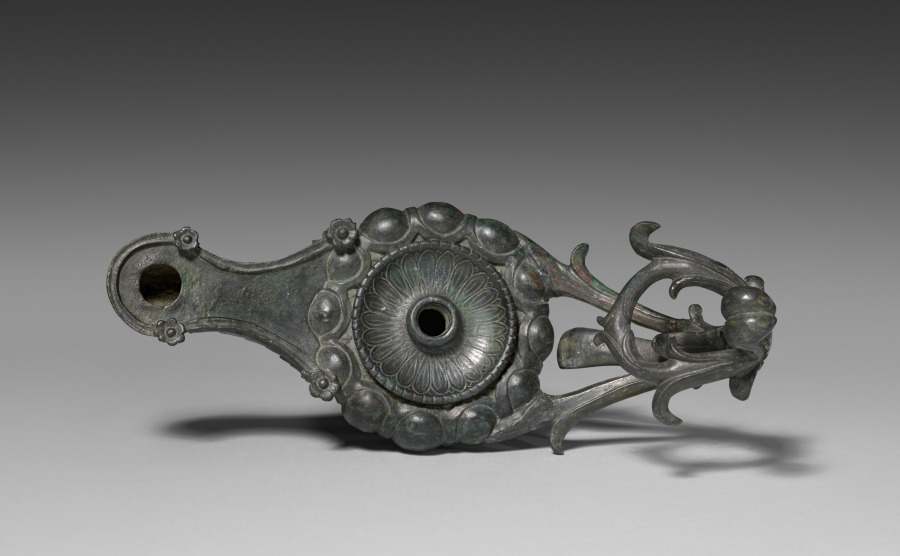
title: Oil Lamp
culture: Roman, late Republican-early Imperial (c. 50 BCE – 50 CE)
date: c. 50 BCE–50 CE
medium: Bronze, cast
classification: Metalwork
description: This large and ornate cast bronze oil lamp features a central hole for filling and a single spout for its wick. Its extravagant handle rises to create both a loop and a sort of hook, one or both of which may have served to suspend the lamp when lit. Alternatively, the lamp may have stood on its own, perhaps atop a tall lampstand. While its primary function may have been for lighting dark spaces, this lamp must also have served an ornamental purpose.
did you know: When used, this lamp likely hung from the ceiling or stood on a tall lampstand.